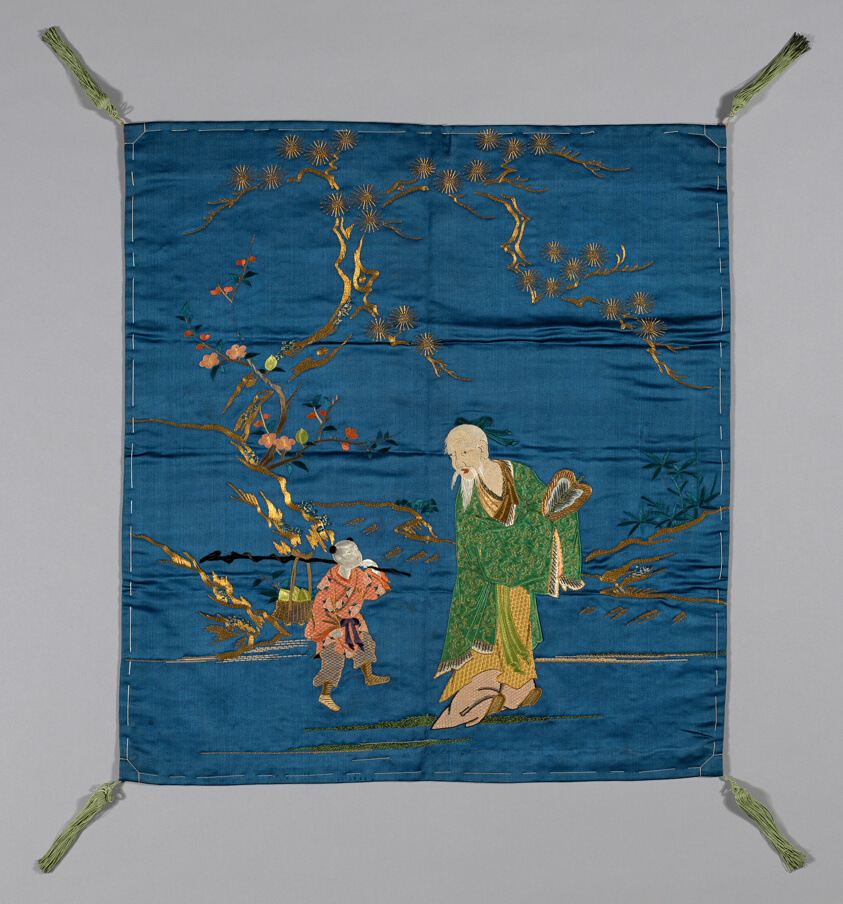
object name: Textile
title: Fukusa (Gift Cover)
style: meiji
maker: Japan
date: Meiji period (1868–1912), late 19th century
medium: Embroidered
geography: Japan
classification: textile; weaving